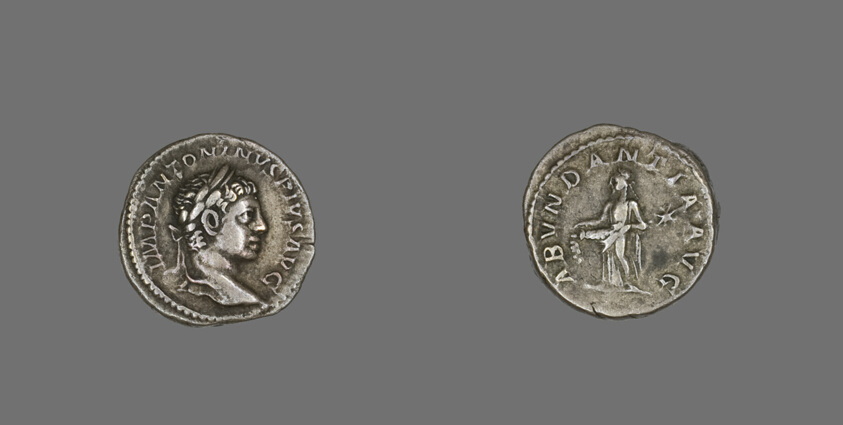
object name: Coin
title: Denarius (Coin) Portraying Emperor Elagabalus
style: roman (ancient, style or period), ancient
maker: Roman, minted in Rome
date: 222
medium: Silver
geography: Roman Empire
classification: coin; ancient art; struck